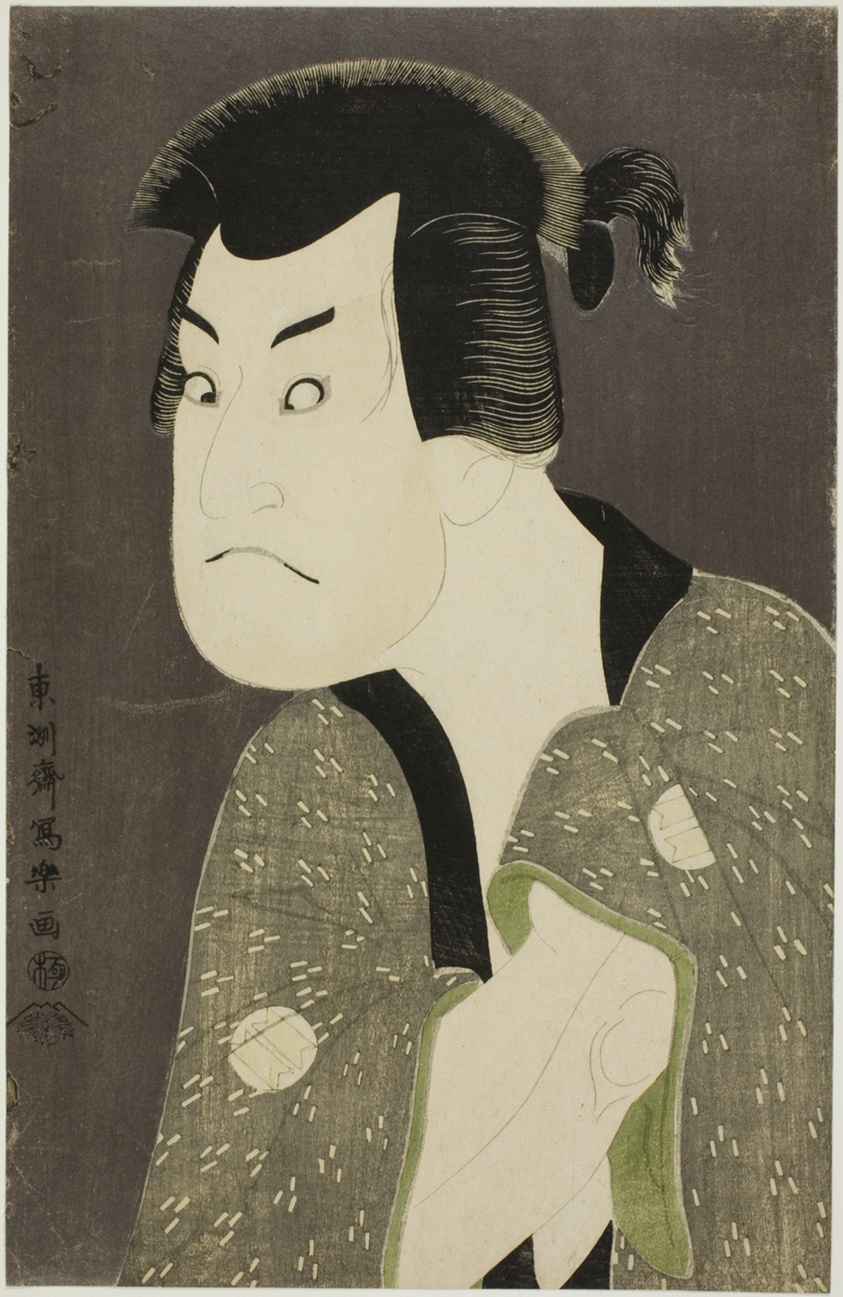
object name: Print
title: The actor Sakata Hangoro III as Fujikawa Mizuemon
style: Japanese (culture or style)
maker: Toshusai Sharaku 東洲斎 写楽; Japanese, active 1794-95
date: 1794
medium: Color woodblock print; oban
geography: Japan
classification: woodblock print; print; asian art